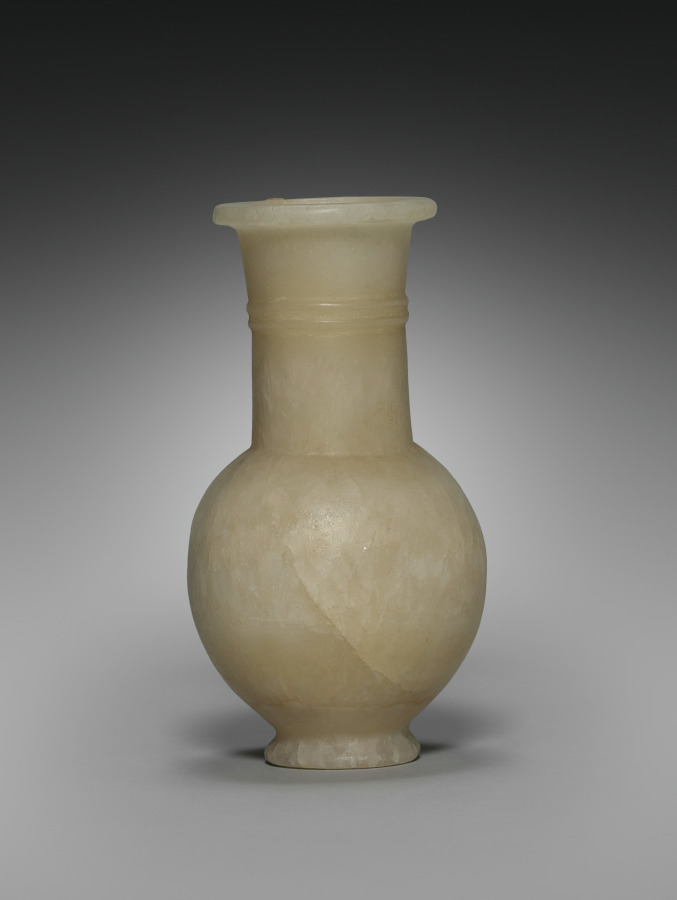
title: Long-Necked Flask with Strap Handle and Lid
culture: Egypt, New Kingdom (1540–1069 BCE), Dynasty 18, reign of Tuthmosis III (1479–1425 BCE)–reign of Amenhotep III (1390–1352 BCE)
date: 1401–1353 BCE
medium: travertine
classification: Vessels